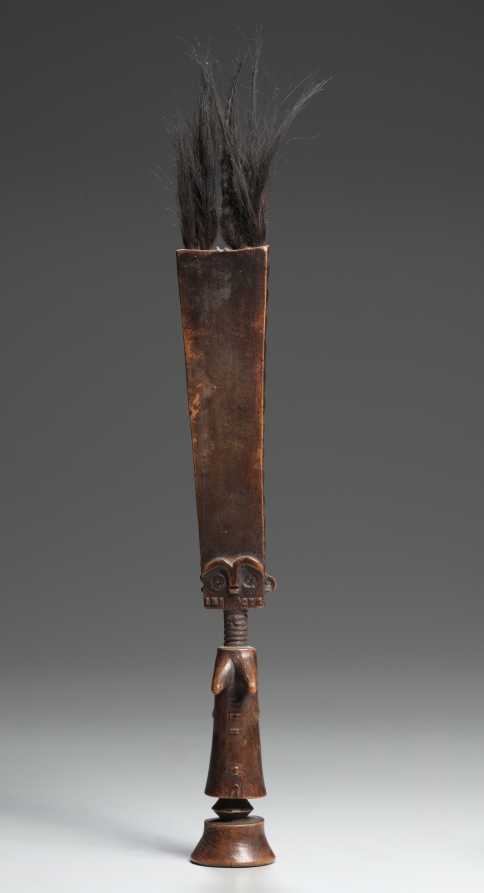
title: Female Figure (akua'ba)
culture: Africa, West Africa, Ghana, Fante-style maker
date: late 1800s–early 1900s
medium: Wood, hair, resin, and bone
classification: Sculpture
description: An infertile woman would be advised by a priest to commission such a sculpture and care for it as if it were her baby. With the aim to induce fertility, or to ensure the birth of a healthy and beautiful daughter, the akua'ba figure is carried on the woman's back inside her wrapper. After a successful birth, the figure is placed in the priest's shrine as an offering, or it is given to the newborn as a toy.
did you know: Akua'ba are always female, both because Akua’s first child was a girl, and because the Akan and Fante societies are matrilineal, meaning that it is women that extend the family line.